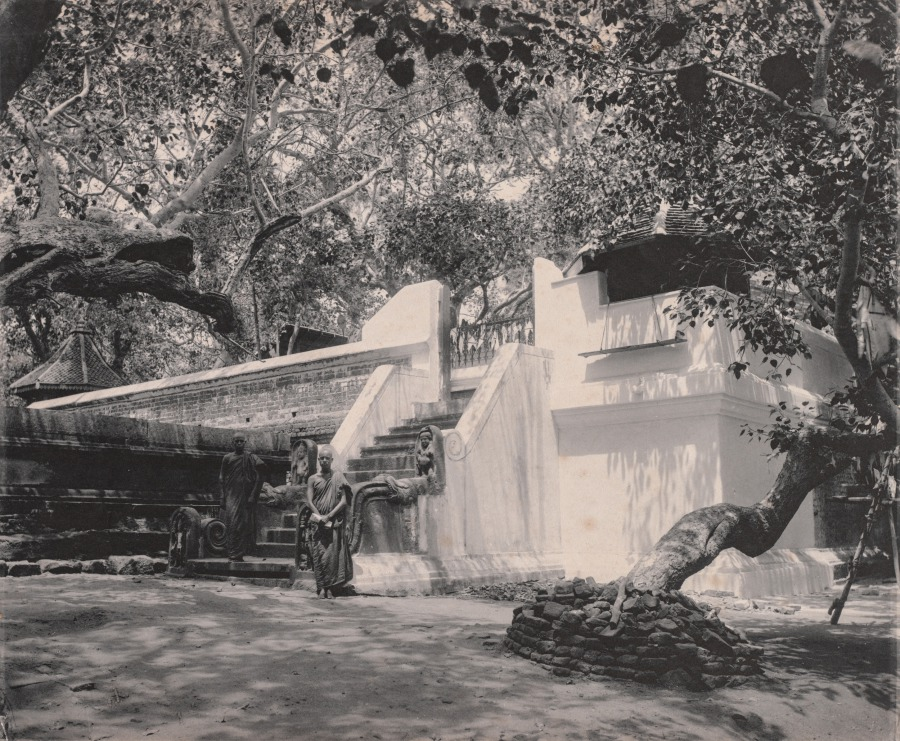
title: Monks Outside Temple, Ceylon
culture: Ceylon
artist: A. W. A. Plâté Studio (Ceylonese)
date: c. 1880s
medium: platinum print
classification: Photograph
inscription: Written in pencil on verso: "v"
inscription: Written in pencil on verso: "224"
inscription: Written in pencil on verso: "224"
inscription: Written in pencil on verso: "CEY-041 1200-"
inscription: Stamped in purple ink on verso: "Series G (written in pencil)/No 224 (written in pencil)/PLATE & CO/CEYLON"